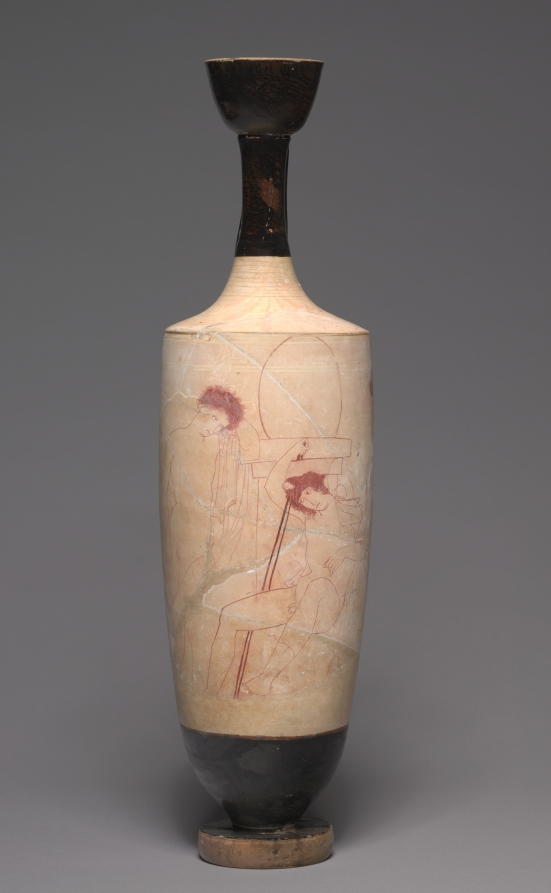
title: White-Ground Lekythos (Oil Vessel): Youths at Tomb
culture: Greek, Attic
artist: attributed to Group R (Greek, Attic, active c. 420–410 BCE)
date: c. 420–400 BCE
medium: ceramic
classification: Ceramic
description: This white-ground lekythos, a large funerary oil vessel, shows three youths at a tomb. The one seated in the center likely represents the deceased, while those standing on either side are mourners. Although much of the pigment is now lost, the strong use of line and three-quarter views have been cited by some scholars as possibly reflecting the lost works of the famous wall-painter Parrhasios.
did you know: White-ground vases give some idea of the appearance of ancient wall painting.